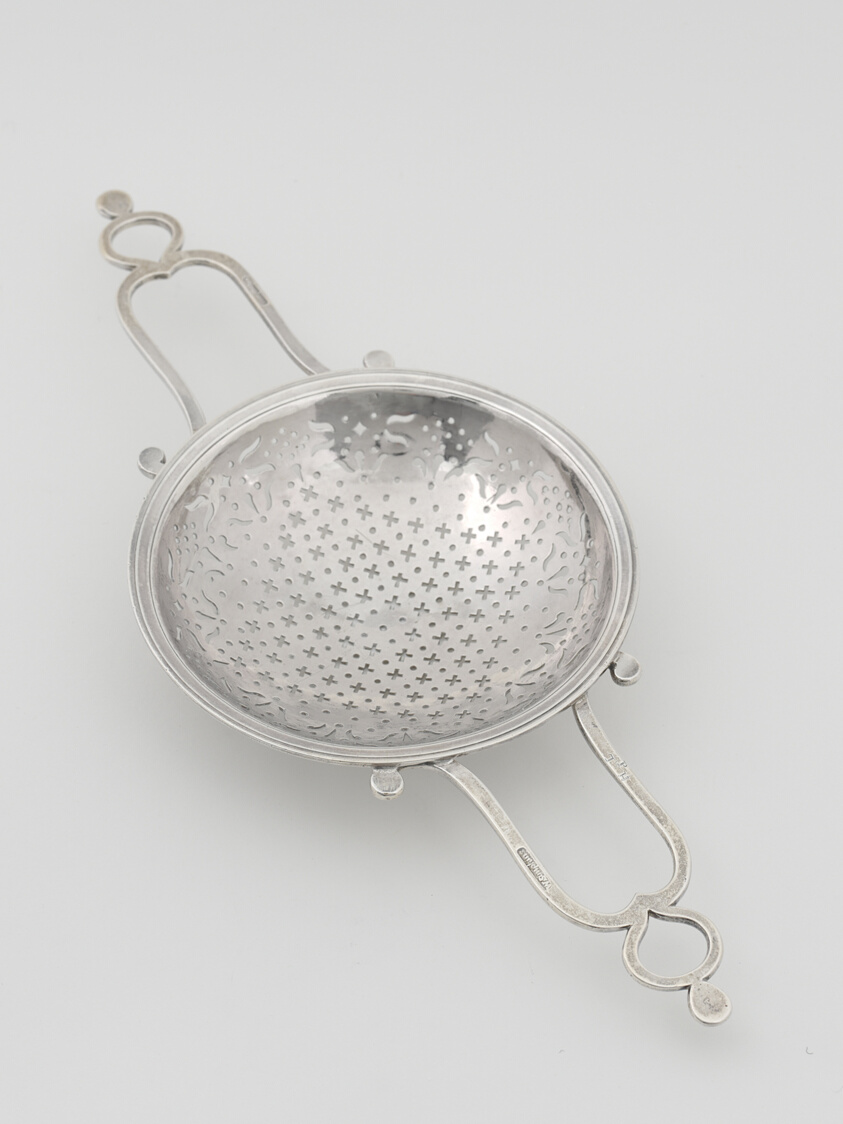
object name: Metalwork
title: Punch Strainer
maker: William Simpkins; American, 1704–1780; Boston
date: 1743–60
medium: Silver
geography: Boston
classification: utensil for serving food; utensil; silver; american decorative arts; american arts; decorative arts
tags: dining, drinking